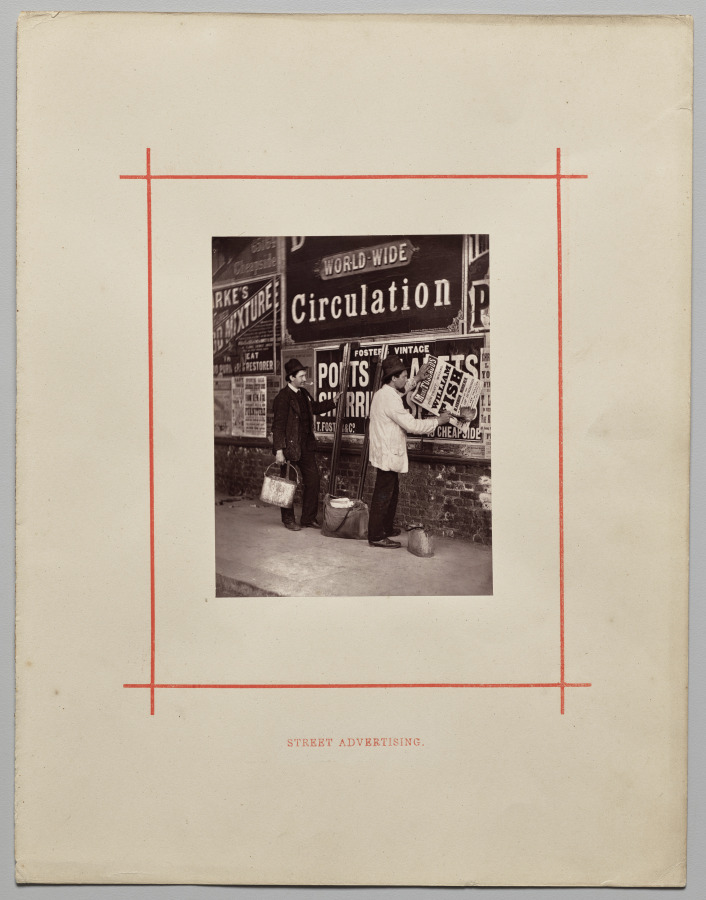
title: Street Advertising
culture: England, 19th century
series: Street Life in London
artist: John Thomson (British, 1837–1921)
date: 1876–77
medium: woodburytype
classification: Photograph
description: The poster being pasted up by the two men in the late 1870s is an ad for Mme. Tussaud’s London, a museum of wax figures that is still in business today. The image was part of John Thomson’s publication Street Life in London, a group of essays and photographsthat was one of the first published compilations of social documentary photographs. It holds a place of honor in the histories of photography, the book, ethnology, and sociology.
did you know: Mme. Tussaud’s wax museum in London was founded in 1835.